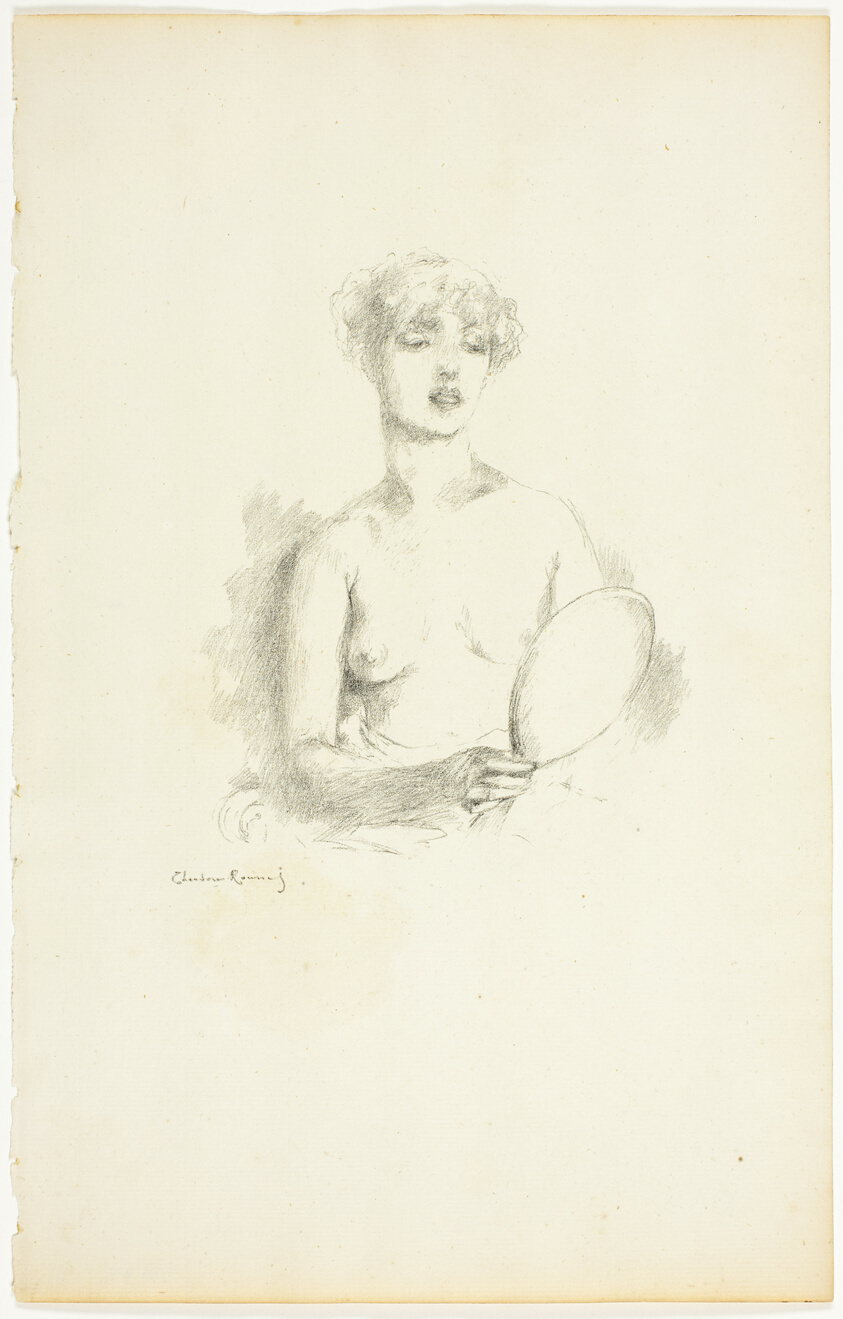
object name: Print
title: La Toilette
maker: Theodore Roussel (French, worked in England, 1847-1926)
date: 1890–94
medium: Transfer lithograph in black on cream laid paper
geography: England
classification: lithograph; paper; print; prints and drawing